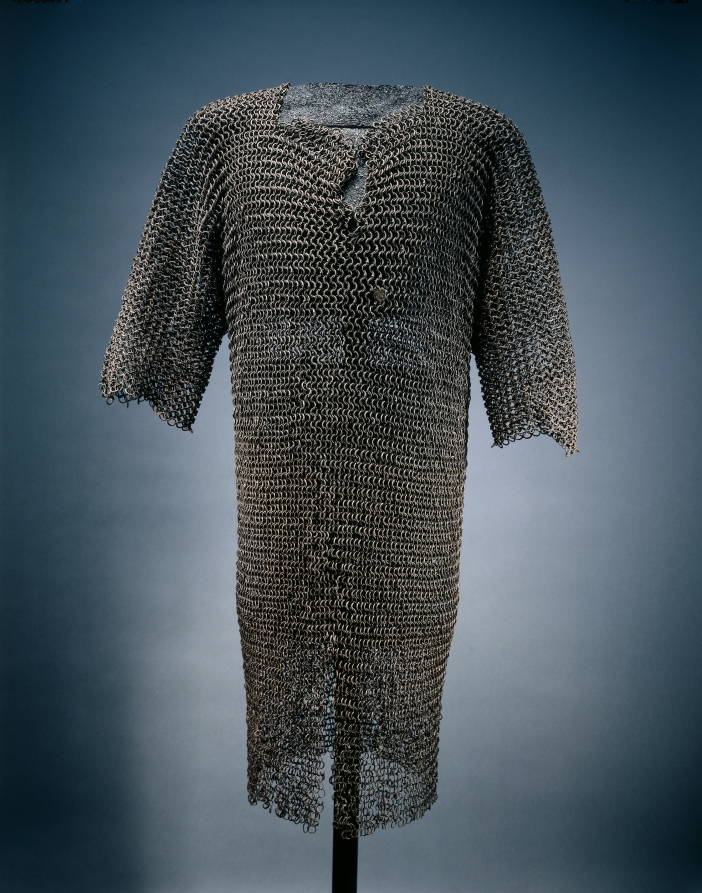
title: Hauberk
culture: Turkey (?), 15th century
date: 1400s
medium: riveted steel rings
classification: Arms and Armor